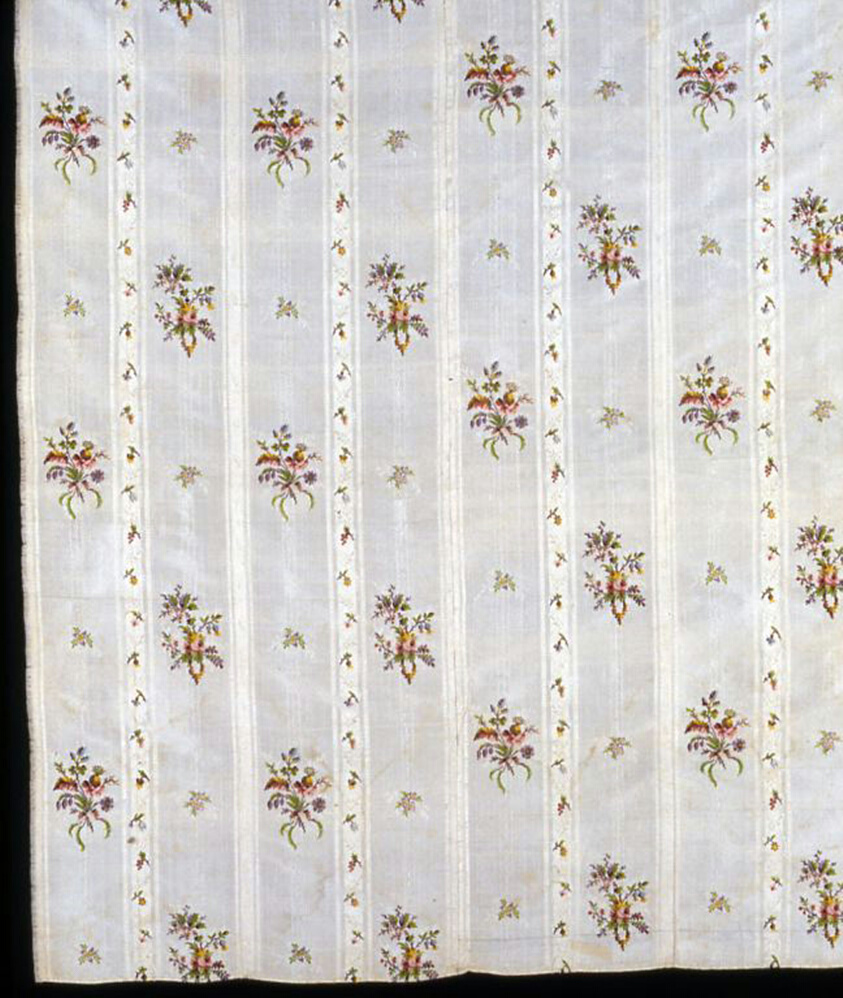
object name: Textile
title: Two Panels from a Skirt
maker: England, Spitalfields or France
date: c. 1775/76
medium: Silk, plain weave with supplementary patterning warps, supplementary brocading wefts, and self-patterned by ground weft floats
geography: England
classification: textile; weaving